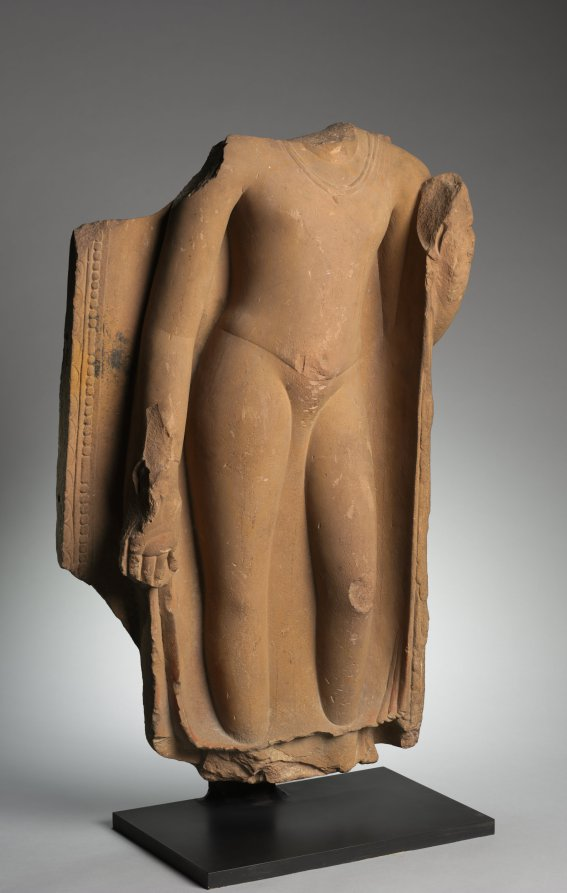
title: Standing Buddha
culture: Northern India, Uttar Pradesh, Sarnath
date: 400s CE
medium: sandstone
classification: Sculpture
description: Depicting the Buddha in a plain robe that clings to the body, without interrupting the beauty of its contours, was a new development in the sculptural workshops of Sarnath during the 400s CE. Sarnath is located near the ancient city of Varanasi on the banks of the Ganges River and is identified as the place where the Buddha gave his first teaching. This form spread by means of portable images to peninsular Southeast Asia.